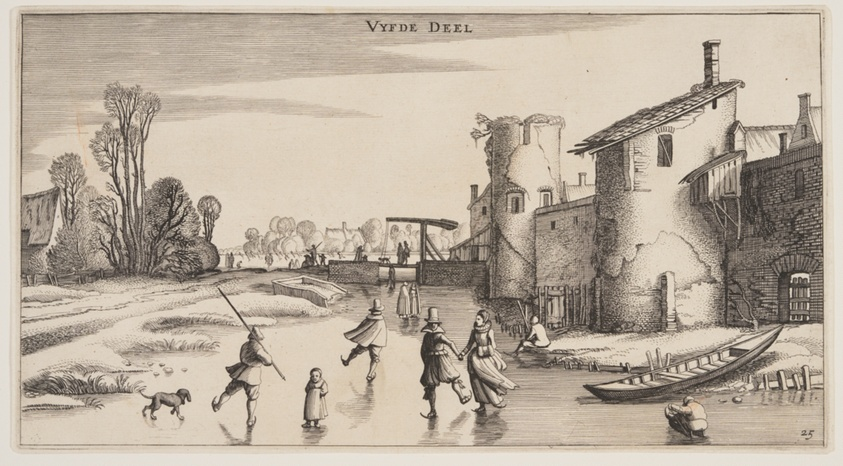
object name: Print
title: Winter Landscape with Skaters Along a Town-Wall, from Landscapes (Playsante Lantschappen)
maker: Attributed to Claes Jansz. Visscher II (Dutch, 1586-1652); after Jan van de Velde II (Dutch, c. 1593-1641)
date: c. 1641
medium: Etching, with engraving, on ivory laid paper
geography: Netherlands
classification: etching; paper; print; prints and drawing